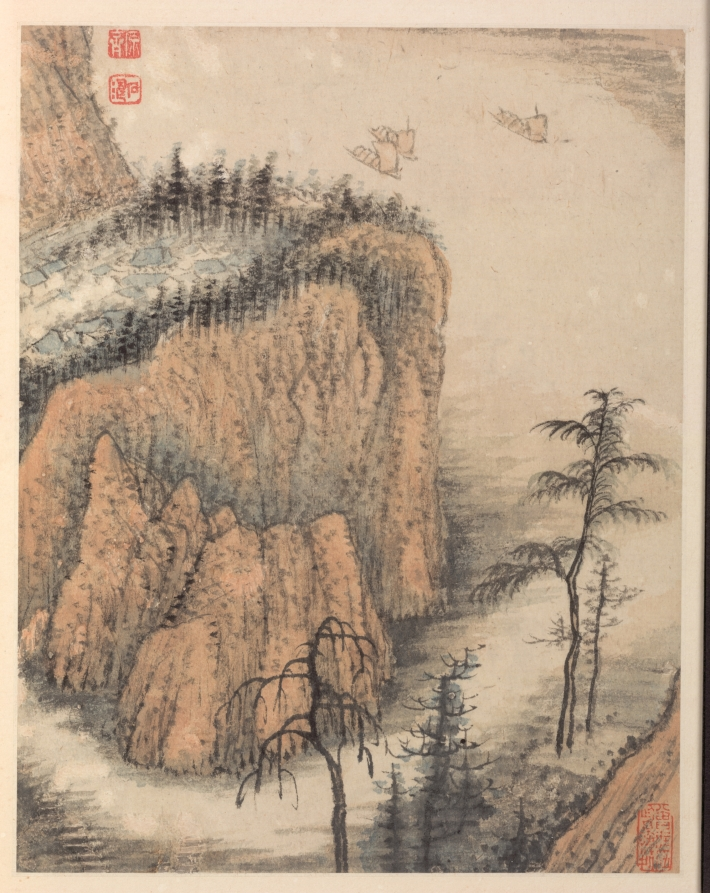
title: Reminiscences of Qinhuai River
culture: China, Qing dynasty (1644-1911)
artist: Shitao (Chinese, 1642–1707)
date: 1642–1707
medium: album leaf, ink and color on Song paper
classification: Painting